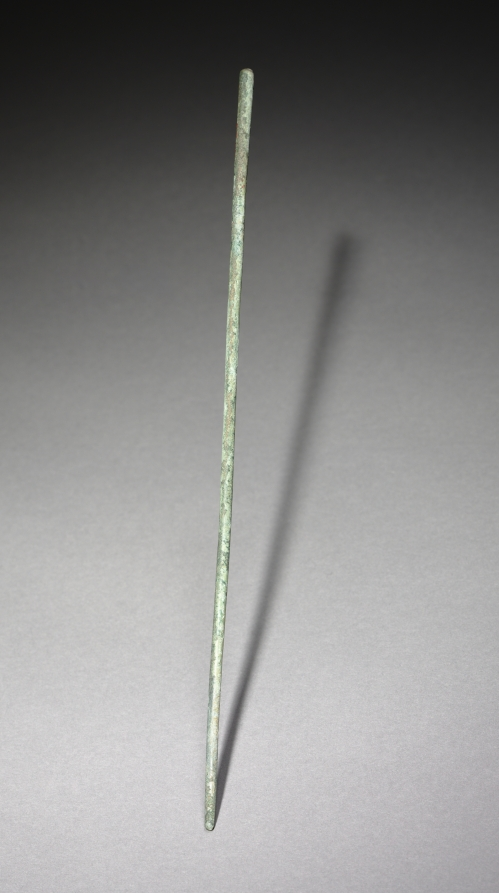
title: Chopstick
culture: Korea, Goryeo dynasty (918–1392)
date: 918–1392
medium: silver bronze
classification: Metalwork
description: In Korea, chopsticks made of metal such as brass, silver, and gold were excavated from ancient tombs and ruins dated to the 6th century at the earliest. Burial goods often include utilitarian objects such as table wares and utensils because the dead were believed to need them in the afterlife.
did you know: In contrast to the Chinese and Japanese, Koreans still prefer metal chopsticks (stainless steel and brass) to wooden ones.